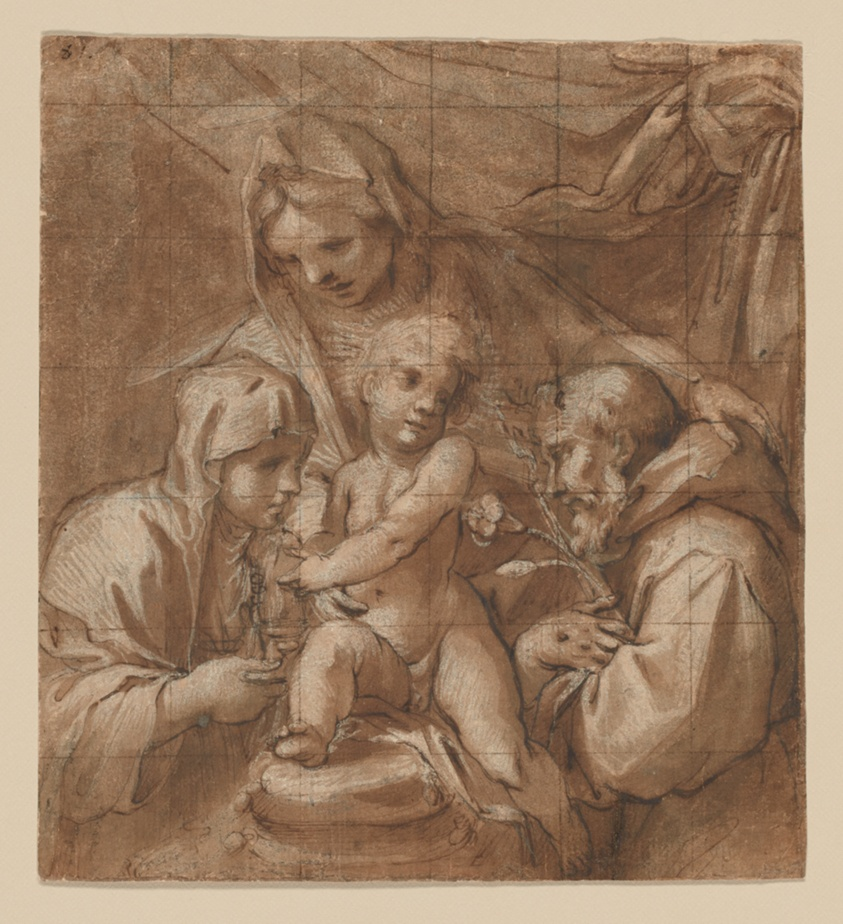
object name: Drawing and Watercolor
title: The Virgin and Child with Saint Clare and Saint Francis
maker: Circle of the Carracci; Italian, late 16th century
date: 1580/90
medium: Pen and brown and black ink, with brush and brown wash and touches of black chalk, heightened with lead white gouache, on cream laid paper, squared for transfer in black chalk, laid down on white Japanese paper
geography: Italy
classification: drawings (visual works); paper; prints and drawing